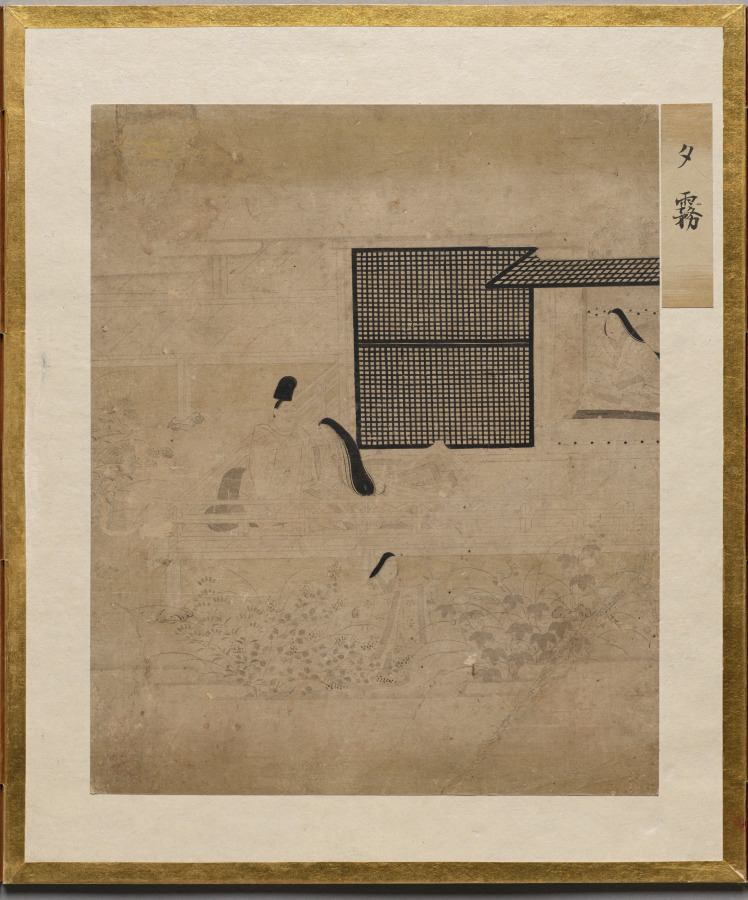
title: Evening Mist from Album of Illustrations for the Tale of Genji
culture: Japan, Edo period (1615–1868)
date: 1600s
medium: painting in an accordion-style album; ink, light color, and gold on paper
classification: Bound Volume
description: This album contains illustrations for the classic literary work the Tale of Genji, authored in the 1000s by Murasaki Shikibu, an aristocrat of the Heian period (794–1185) court. The scenes are painted in the “white drawing” (hakubyō) mode, in which a fine ink line is used to depict figures and spaces with great subtlety, punctuated only occasionally by traces of red pigment for a character’s lips, a detail of a garment, or a decorative element. These two scenes illustrate episodes from the chapters “Thin Veil of Cloud” (Usugumo) and “Barrier Gate” (Sekiya).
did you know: The illustrations are identified by chapter title in cartouches to the upper right of the paintings.